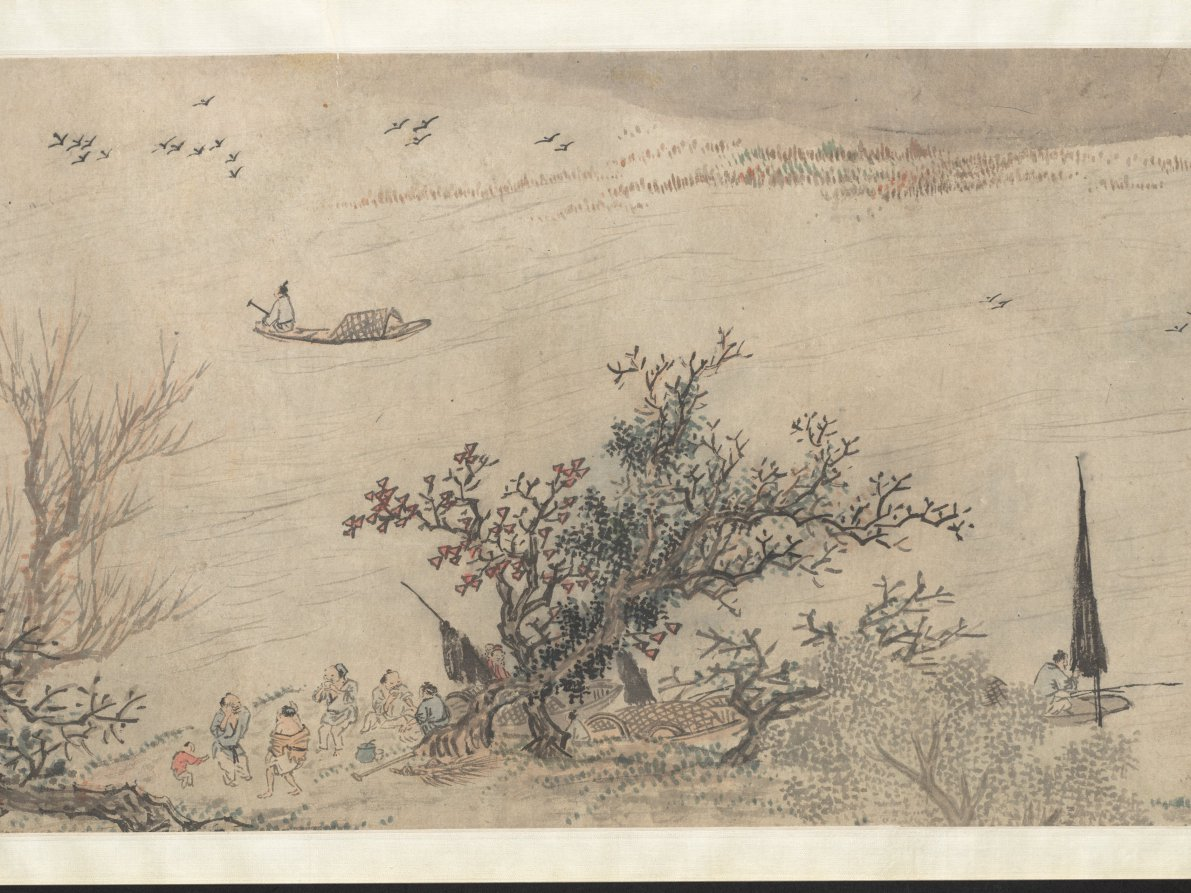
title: Fisherman's Joy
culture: China, Ming dynasty (1368–1644)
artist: Qian Gu (Chinese, 1508–c. 1578)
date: 1572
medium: Handscroll; ink and light color on paper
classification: Painting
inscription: Artist's inscription, signature, and seal: On the autumn day of the jen-shen year [1572], P'eng-ch'eng, Ch'ien Ku painted [this]. [seal] Hsüan-ch'ing shih. 2 colophons, both dated 1689, and 5 additional seals of Yün Shou-p'ing (1633-1690).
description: This painting has a scene showing two small crafts, each manned by two fishermen, practicing a traditional fishing method. In one of them, a man uses a bamboo pole to direct the movements of a cormorant bird sent into the water. Cormorant fishing, witnessed in some areas of the lower Yangzi River, appears in Zhe school paintings. Qian Gu may have borrowed these narrative figure scenes from Zhe school paintings, while his vantage point, brushwork, and soft tones align with the Wu school style. Scenes of fishermen appealed to urban and educated audiences who idealized the self-sufficient independence of fisherfolk.